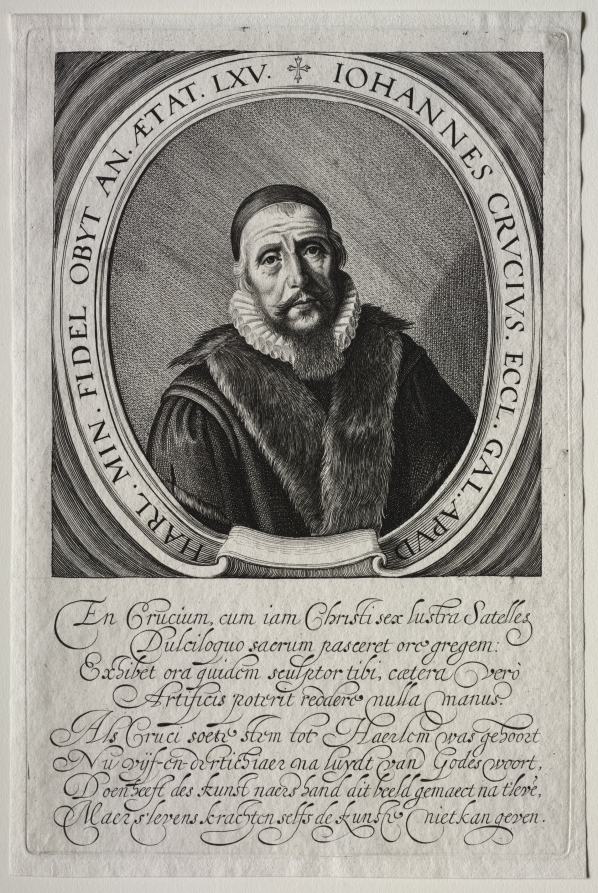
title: Johannes Crucius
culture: Netherlands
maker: Jan van de Velde II (Dutch, 1593–1641)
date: c. 1625–30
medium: engraving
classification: Print